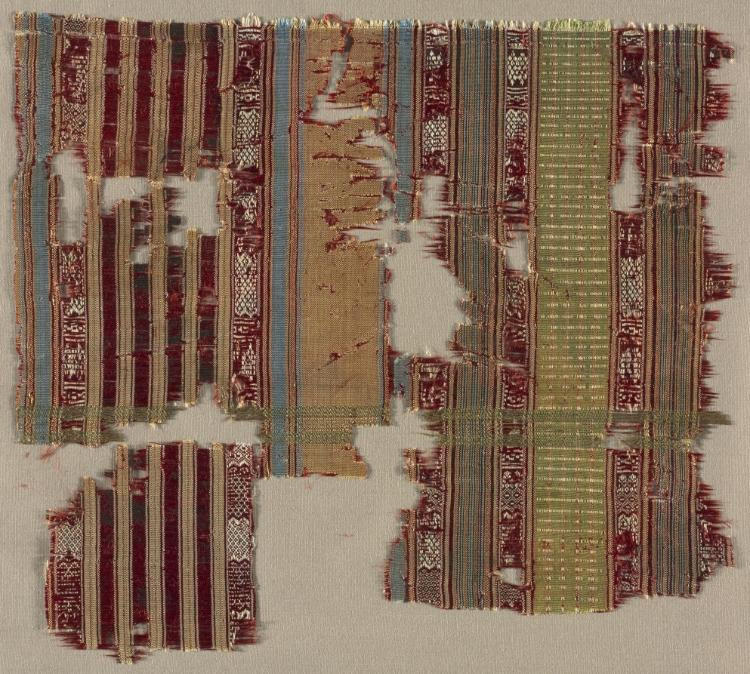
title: Striped fragment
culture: Egypt or Syria, Mamluk period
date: 1200s–1300s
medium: tabby and fancy weave; silk and gold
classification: Textile